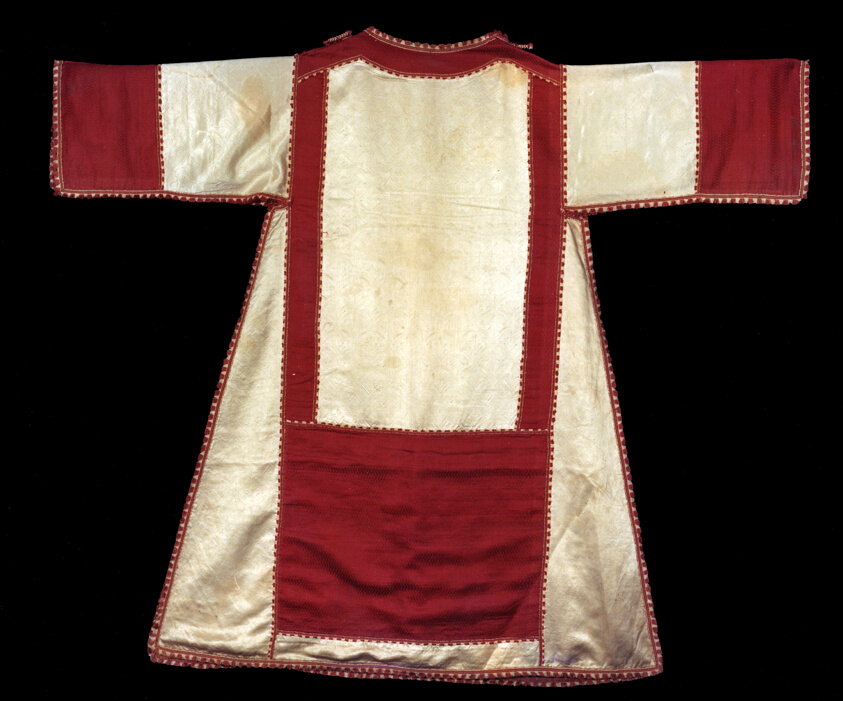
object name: Textile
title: Dalmatic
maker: Spain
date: c. 1600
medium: Silk, warp-float faced 4:1 satin weave; stamped; apparels and orphrey bands: 4:1 satin damask weave; fringe: warp-faced plain weave with extended ground weft uncut fringe; closures of oblique interlacing; lined with linen, plain weave; glazed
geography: Spain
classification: textile; weaving; costume; liturgical